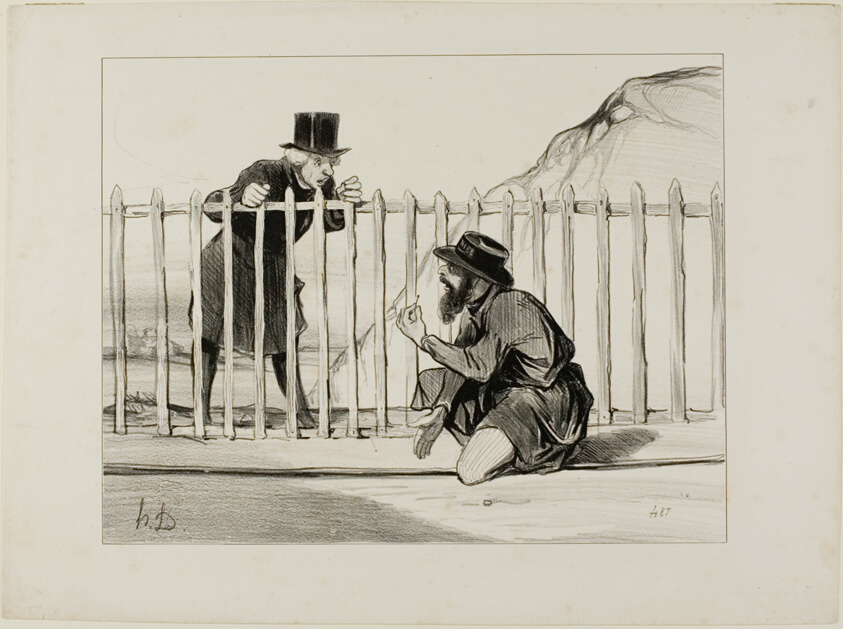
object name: Print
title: “- Just look at that! the train that's about to pass is lucky to have a narrow escape.... the whole affair would have blown up if I hadn't noticed in time... - What is it then, what is it? - Why, it's obvious, a needle has been placed right on the rail... luckily I saw it in just in time!,” plate 1 from Les Chemins De Fer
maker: Honoré Victorin Daumier; French, 1808-1879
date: 1843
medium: Lithograph in black on white wove paper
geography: France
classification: lithograph; print; prints and drawing